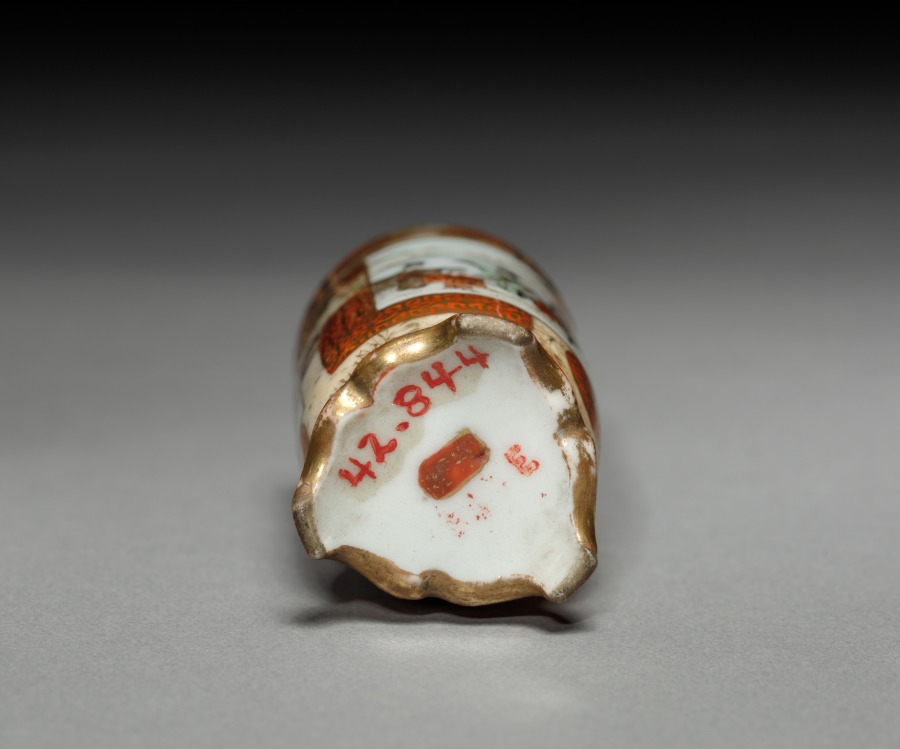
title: Miniature Vase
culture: Japan, Edo period (1615–1868) to Meiji period (1868–1912)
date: 1800s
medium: overglaze porcelain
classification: Ceramic